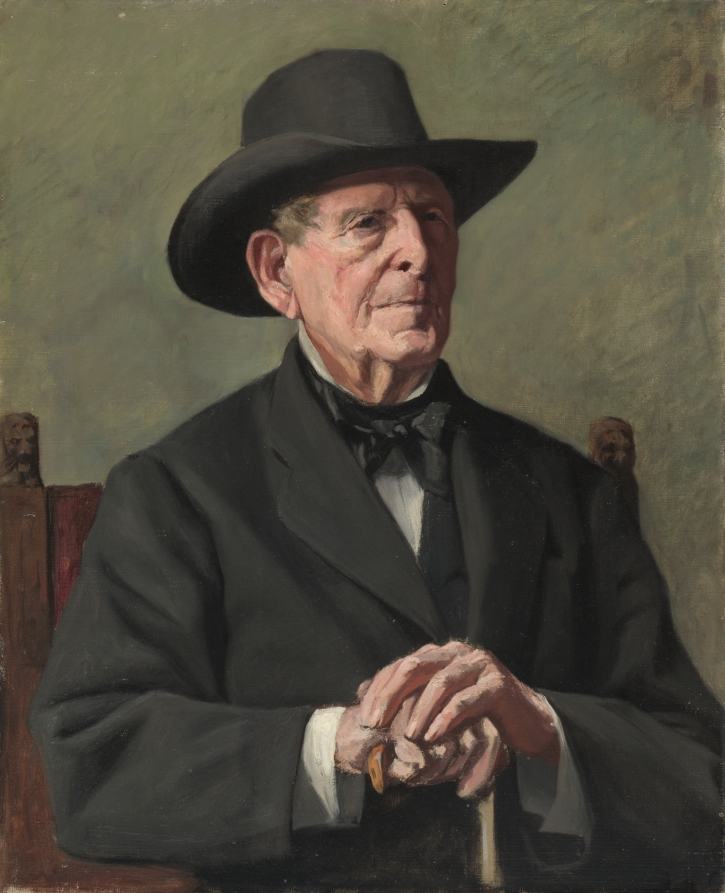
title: Portrait of an "Old Sea Captain"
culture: America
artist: Samuel Isham (American, 1855–1914)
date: 19th century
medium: oil on canvas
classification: Painting